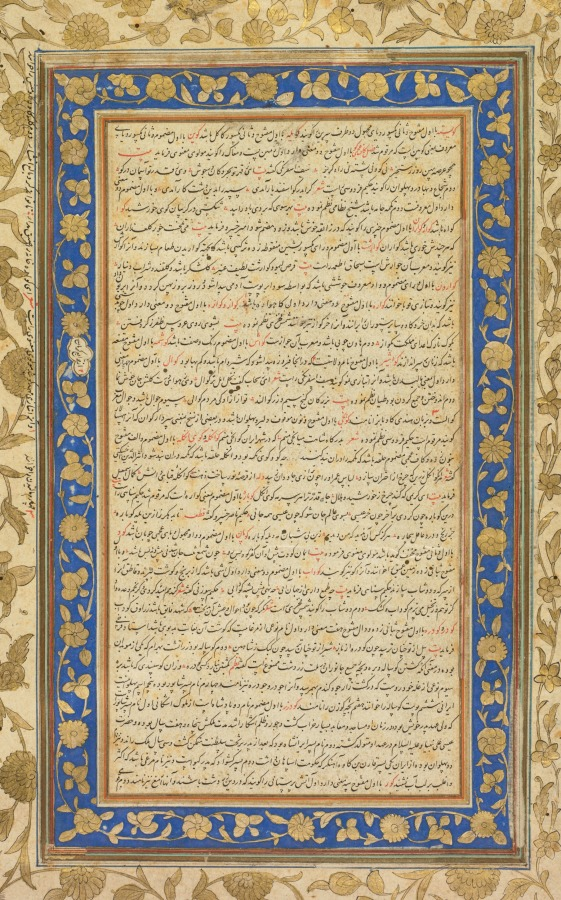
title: From the Farhang-i Jahangiri (Persian-language Dictionary) compiled by Mir Jamal al-Din Husayn Inju of Shiraz (Persian, d. 1626)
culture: Mughal India, court of Jahangir (1605–1627)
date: 1607–8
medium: Gum tempera, ink, and gold on paper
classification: Painting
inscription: Recto: “kuyesteh” (misspelling of “kunisteh,” meaning two halves of the buttocks) to “Gur” (name of a people in India); Verso: “Gur” to “Gush” (morning east breeze, zephyr)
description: Farhang-i Jahāngīrī, one of the most complete and authoritative dictionaries of the Persian language, was compiled by Mir Jamal al-Din Husayn Inju. It took him 12 years to compile over 9,000 words with definitions and examples from verses by Persian poets. He was born in Shiraz, Iran, but lived most of his life in Agra, India, so the dictionary was named honor of the Mughal emperor Jahangir, who reigned from 1605 to 1627.